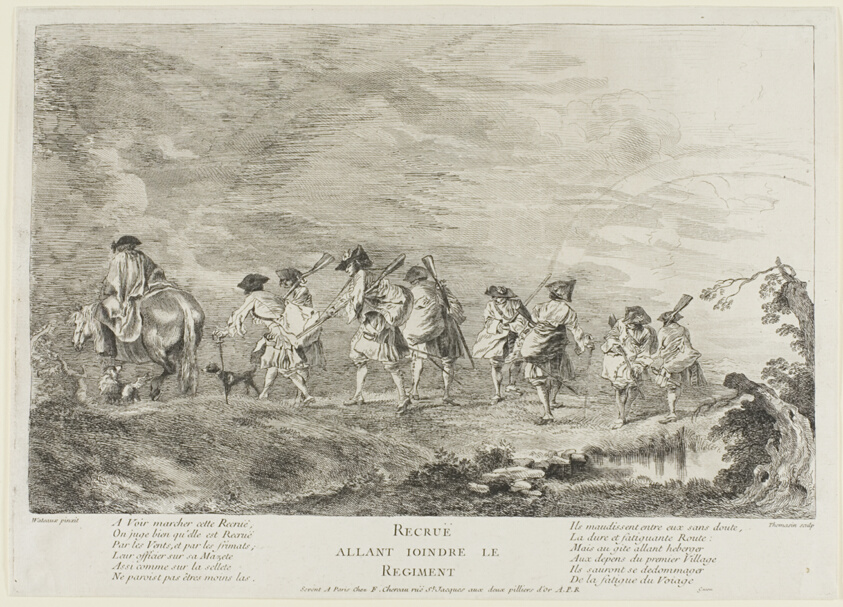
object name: Print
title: Recruits Going to Join the Regiment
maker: Henri-Simon Thomassin (French, 1687-1741); after Jean Antoine Watteau (French 1684-1721); published by François Chéreau (French 1680-1729)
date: 1717–26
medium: Etching, with engraving on off-white laid paper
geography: France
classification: etching; paper; print; prints and drawing